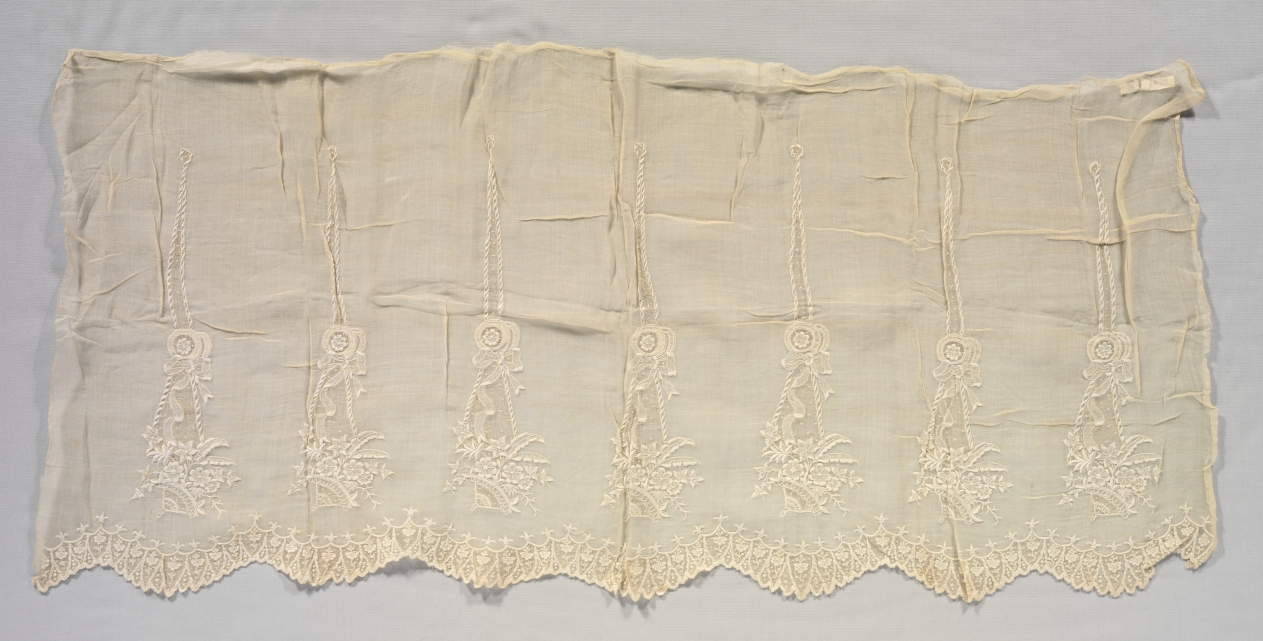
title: Sleeve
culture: Philippines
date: c. 1875–1900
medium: Plain weave piña: needle lace (drawnwork) and embroidery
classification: Embroidery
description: This unsewn sleeve panel is made of fine piña fiber in plain weave. The lower edge is finished with a wide hand-embroidered cotton border featuring scalloped edging and repeating floral and geometric motifs. Vertical embroidered elements are arranged in regular intervals above the border.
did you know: Piña is also called pineapple fiber.